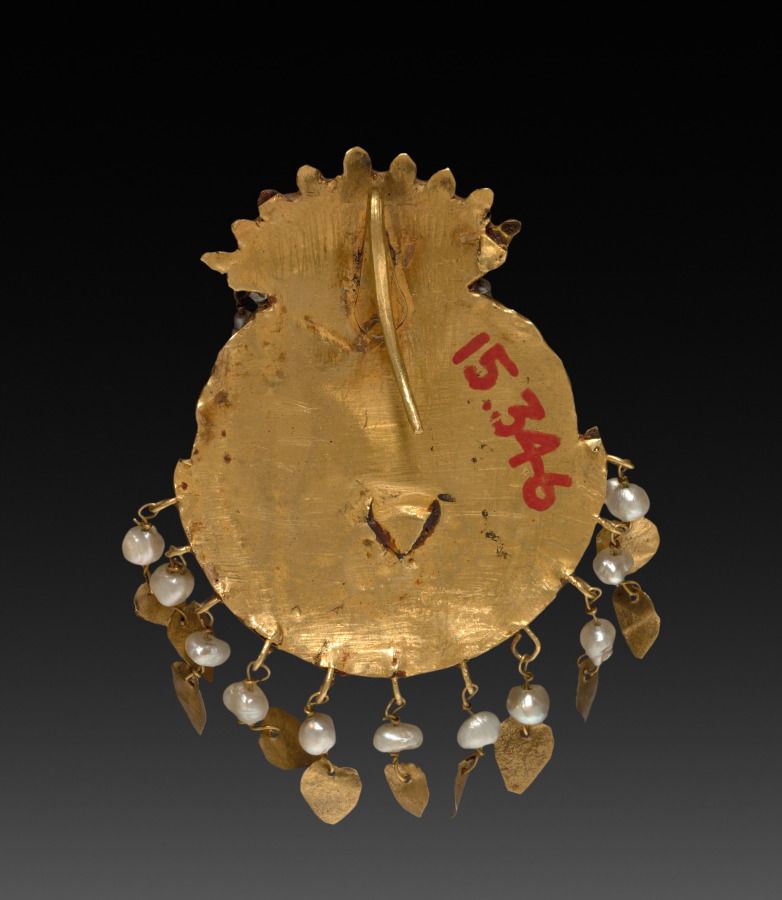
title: Earring with Four-Armed Vishnu Riding Garuda with Nagas (serpent divinities)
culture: Nepal, Kathmandu Valley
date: 1600s or 1700s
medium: repousse gold with pearls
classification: Jewelry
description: In Nepal, sculptures of deities were adorned with jewelry larger than pieces made for human beings. This pair of earrings features the Hindu god Vishnu seated cross-legged riding his mount the man-eagle Garuda. Garuda's arms are outstretched, grabbing the tails of serpents whose braided bodies snake up both sides of each earring. His wings drape like a cape behind him, and his talons clutch his crescent moon perch. Serpent hoods rise up behind Vishnu like a canopy.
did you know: Vishnu and Garuda are solar deities, and they sit on the crescent moon, so the light of both celestial bodies shines from these earrings.